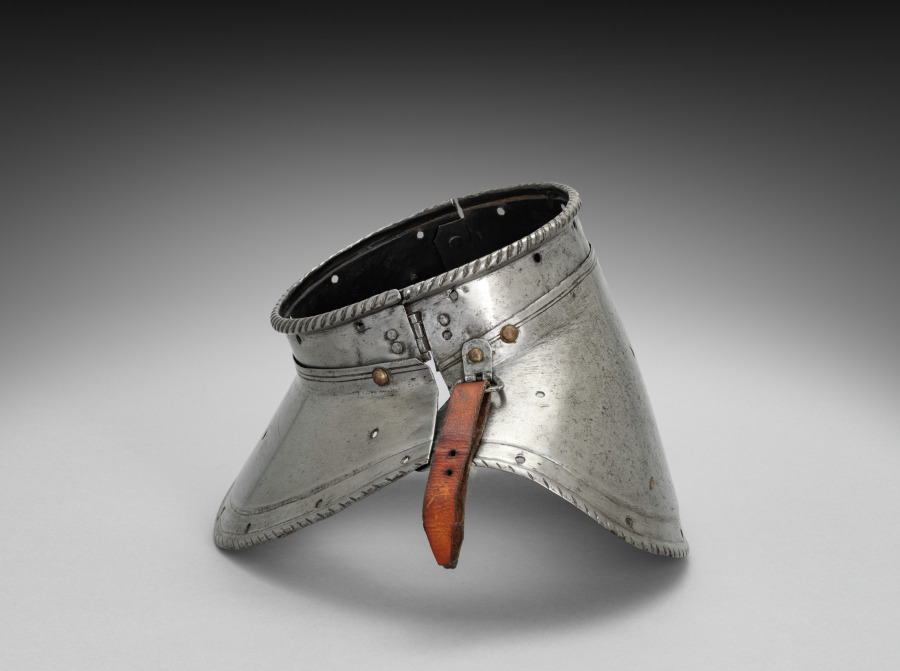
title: Colletin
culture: Germany, 19th century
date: 1801–1900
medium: steel with black paint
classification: Arms and Armor